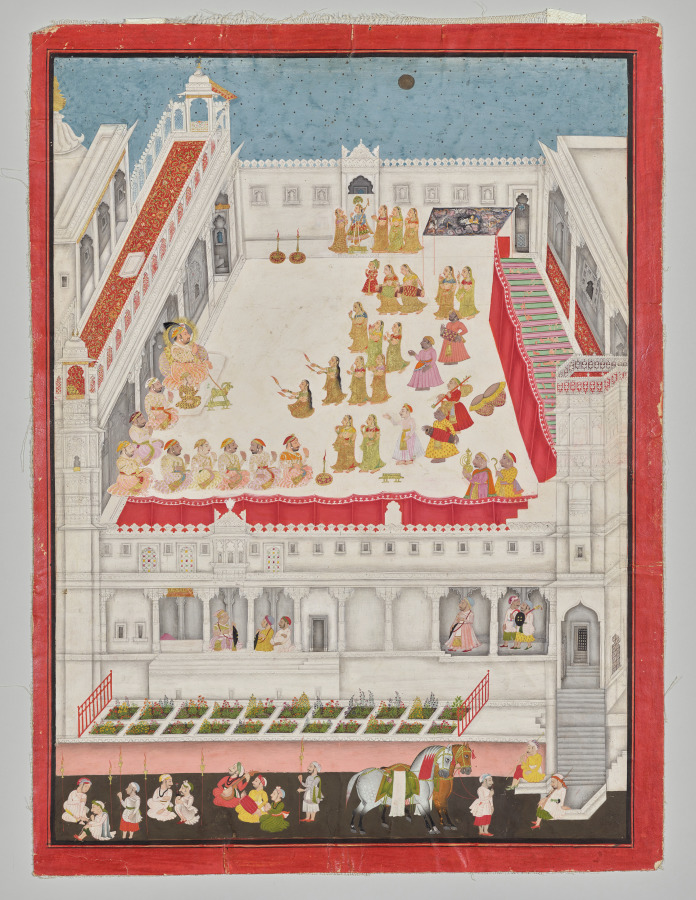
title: Maharana Jagat Singh Attending the Raslila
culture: Northwestern India, Rajasthan, Mewar, Udaipur, 18th century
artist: attributed to Jai Ram (Indian, active 1710–40)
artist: and/or Jiva (Indian, active mid-1700s)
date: 1736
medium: Gum tempera, gold, and silver on paper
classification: Painting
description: To celebrate the New Year festival of Diwali, dancers reenact the life story of the Hindu god Krishna in a palace courtyard by candlelight under the full moon. The king, a vassal of the Mughal emperor, sits with the halo of divine sanction for his rule at the left of the courtyard, smoking from a golden goat-shaped hookah, with his young son and heir at his side. At the top of the composition, a dancer dressed in blue with a peacock-feather crown plays the part of Krishna. In the upper right corner, a canopy painted with swirling storm clouds stands for the rainstorm sent by the jealous king of the gods, who is shown in the middle of the canopy with his consort and mount, the elephant with seven trunks. Guards and grooms in the foreground entertain themselves with music while they wait with the horses of visiting nobles. The formal geometric gardens, playful use of perspective, and individualized portraiture indicate the selective adoption of the styles and sensibilities of the imperial Mughal court in the paintings from this large-format series.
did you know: This painting is one of a set of eight.